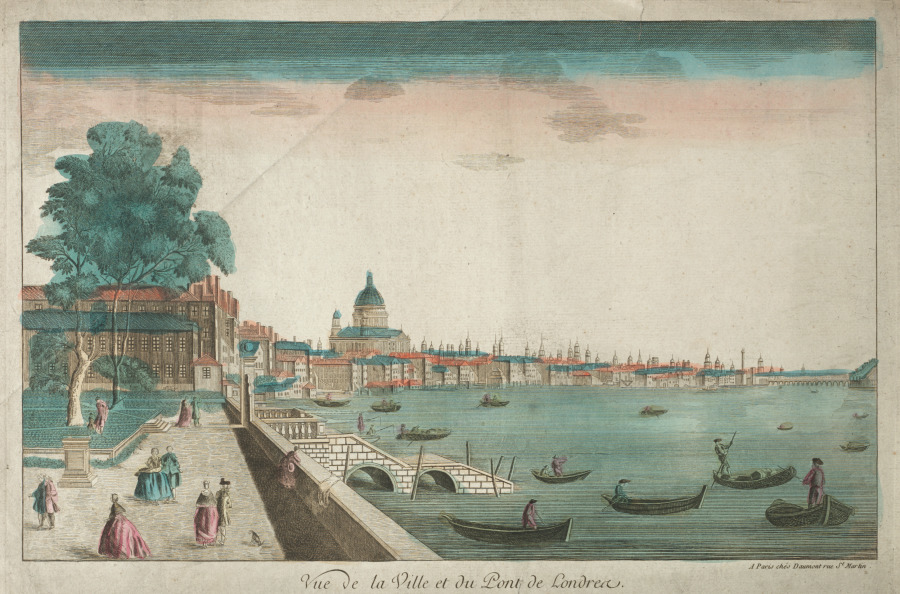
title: View of the City and London Bridge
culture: England, 18th century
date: 1700s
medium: Hand-colored engraving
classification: Print